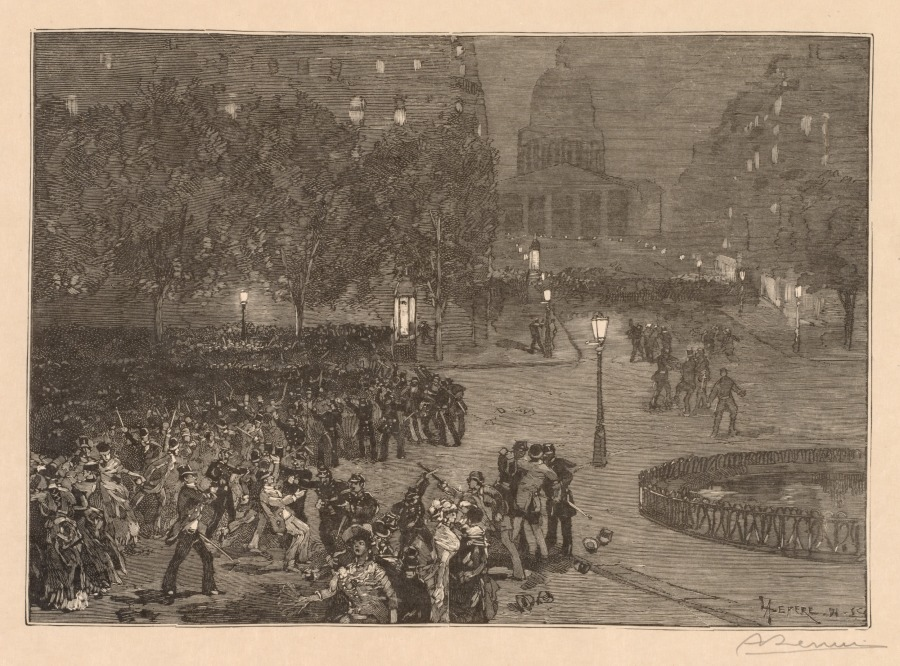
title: Bois du Monde: Les troubles du quartier Latin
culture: France, 19th century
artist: Auguste Louis Lepère (French, 1849–1918)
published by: published in Le Monde Illustree, June 10, 1882, and later issued as signed print in the delux portfolio Bois du Monde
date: 1882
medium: wood engraving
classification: Print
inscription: below image, in graphite, right: A Lepere; lower center margin, in graphite: Les troubles du quartier Latin dans la soirée de 25 Mai, 1882 EA; lower right corner, in graphite: 8929; in plate, lower right: ALepere - Dd - SC Dealer's typed label on mat: 8929 $350